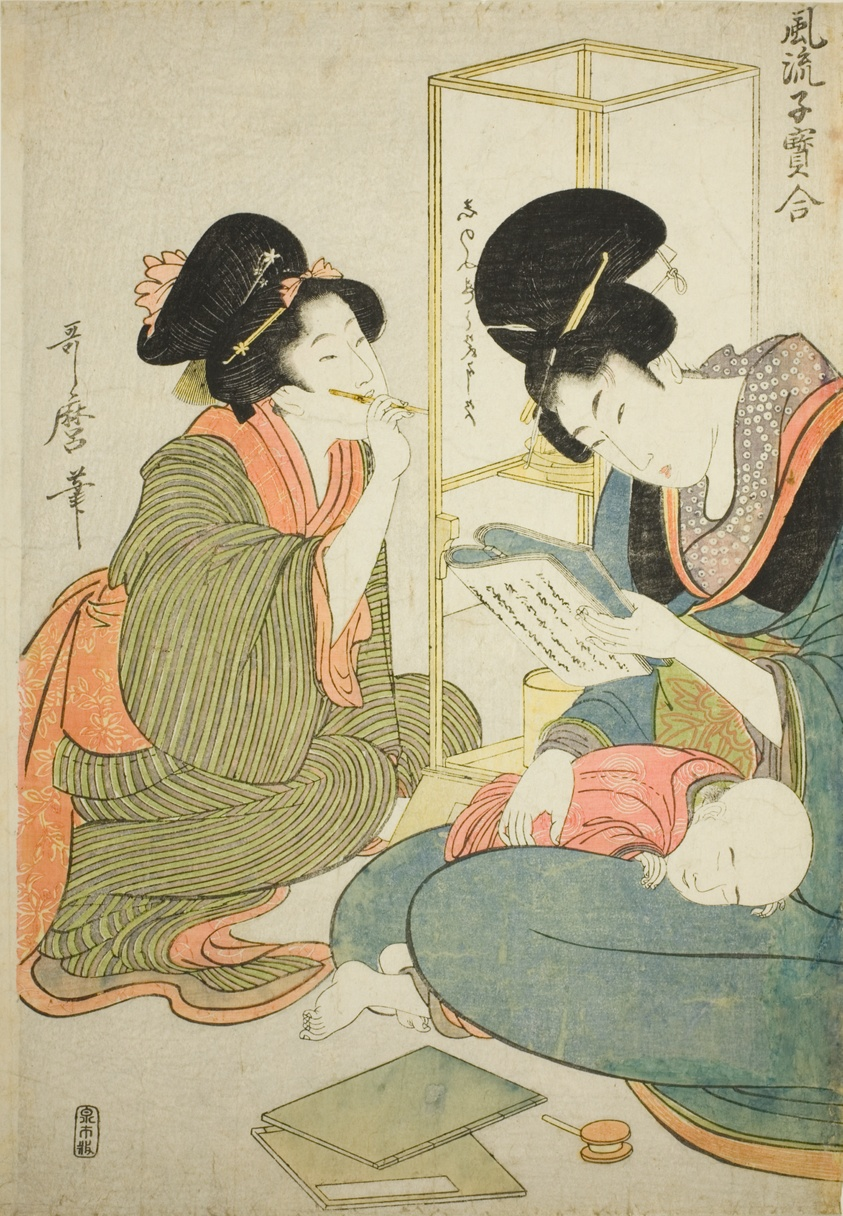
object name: Print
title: Woman Reads while Child Sleeps on her Lap, from the series "Elegant Comparison of Little Treasures (Furyu kodakara awase)"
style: Japanese (culture or style)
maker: Kitagawa Utamaro 喜多川 歌麿; Japanese, 1753 (?)-1806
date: c. 1802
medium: Color woodblock print; oban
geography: Japan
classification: woodblock print; print; asian art